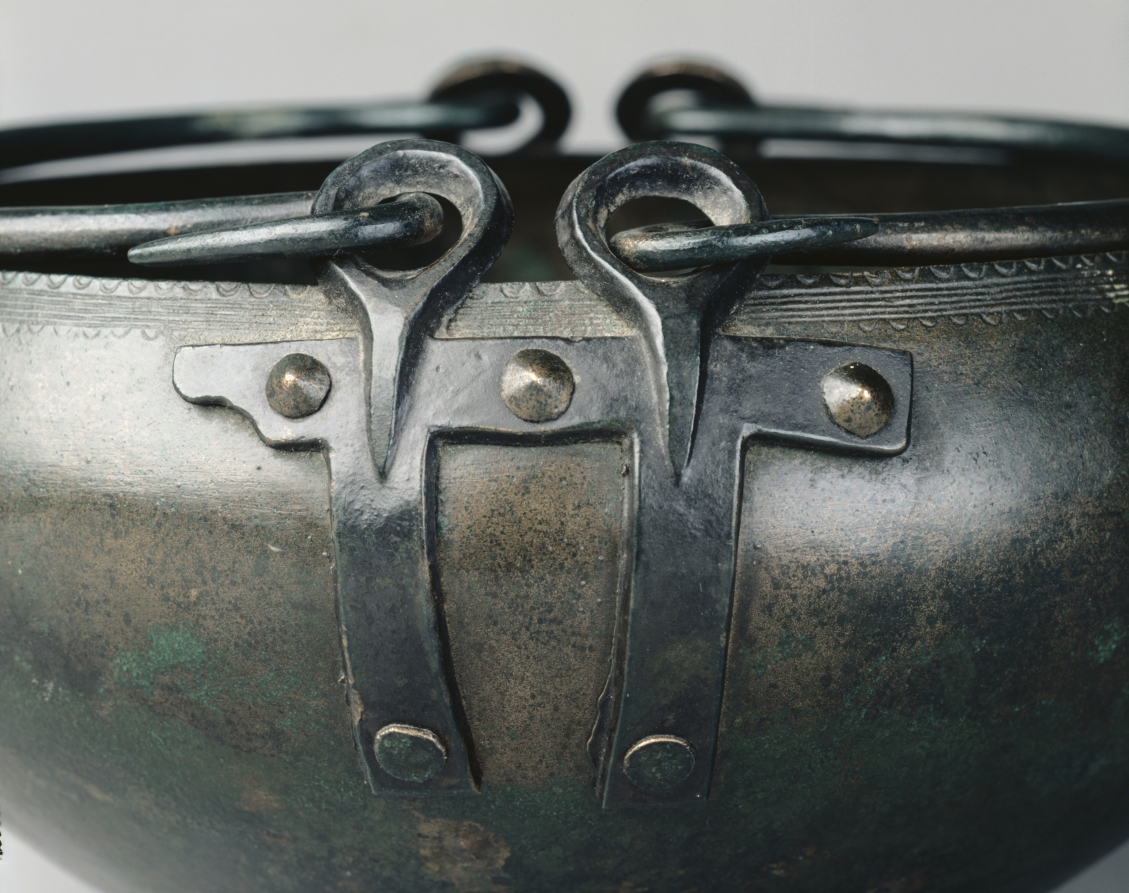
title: Ritual Cauldron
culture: Hungary, Bronze Age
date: c. 1000–900 BCE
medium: bronze, hammered, cast and wrought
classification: Metalwork